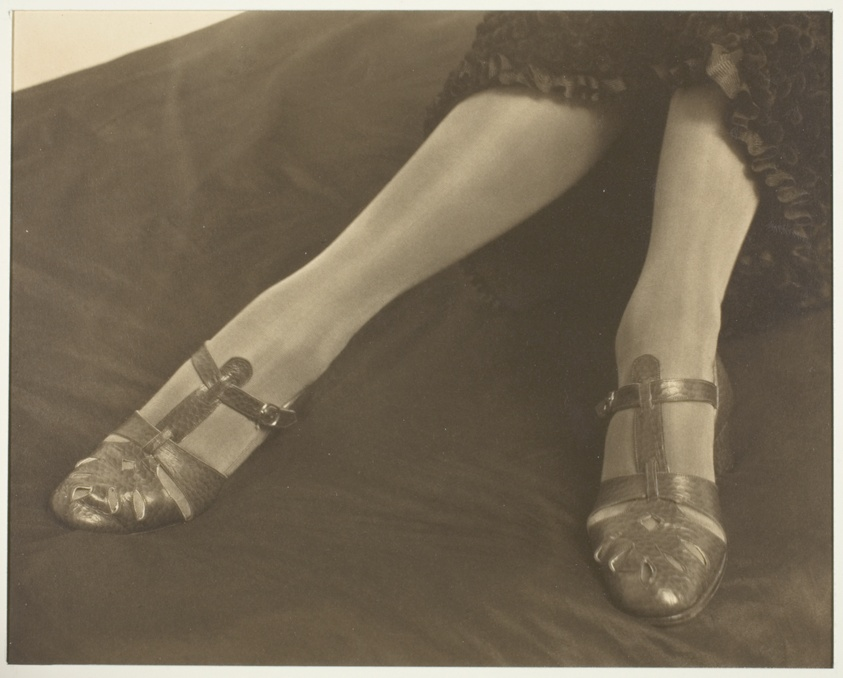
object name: Photograph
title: Katharine Dudley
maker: Alfred Stieglitz (American, 1864–1946)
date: 1922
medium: Palladium print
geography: United States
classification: palladium print; photographic process; photography; photograph